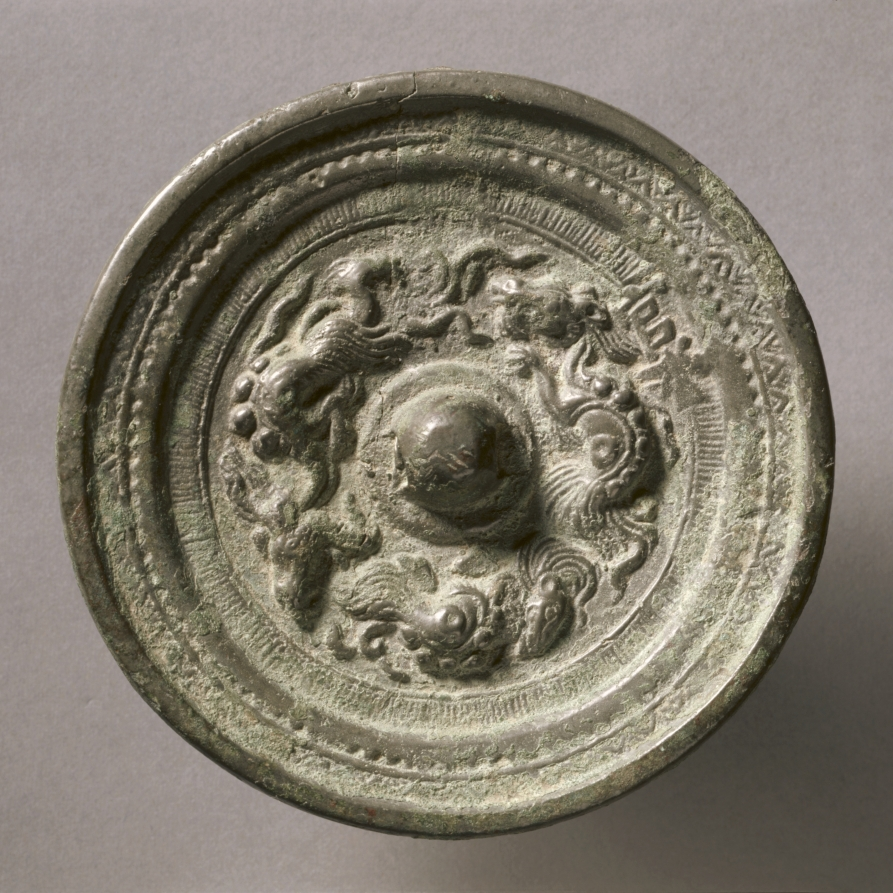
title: Mirror with Three Dragons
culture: China, Jin dynasty (1115-1234)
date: early 1100s–early 1200s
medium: bronze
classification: Metalwork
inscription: an unidentified cipher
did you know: Mirrors typically have one polished and one decorated side and were used in part in tombs for ritual purpose or served as disks for reflection.